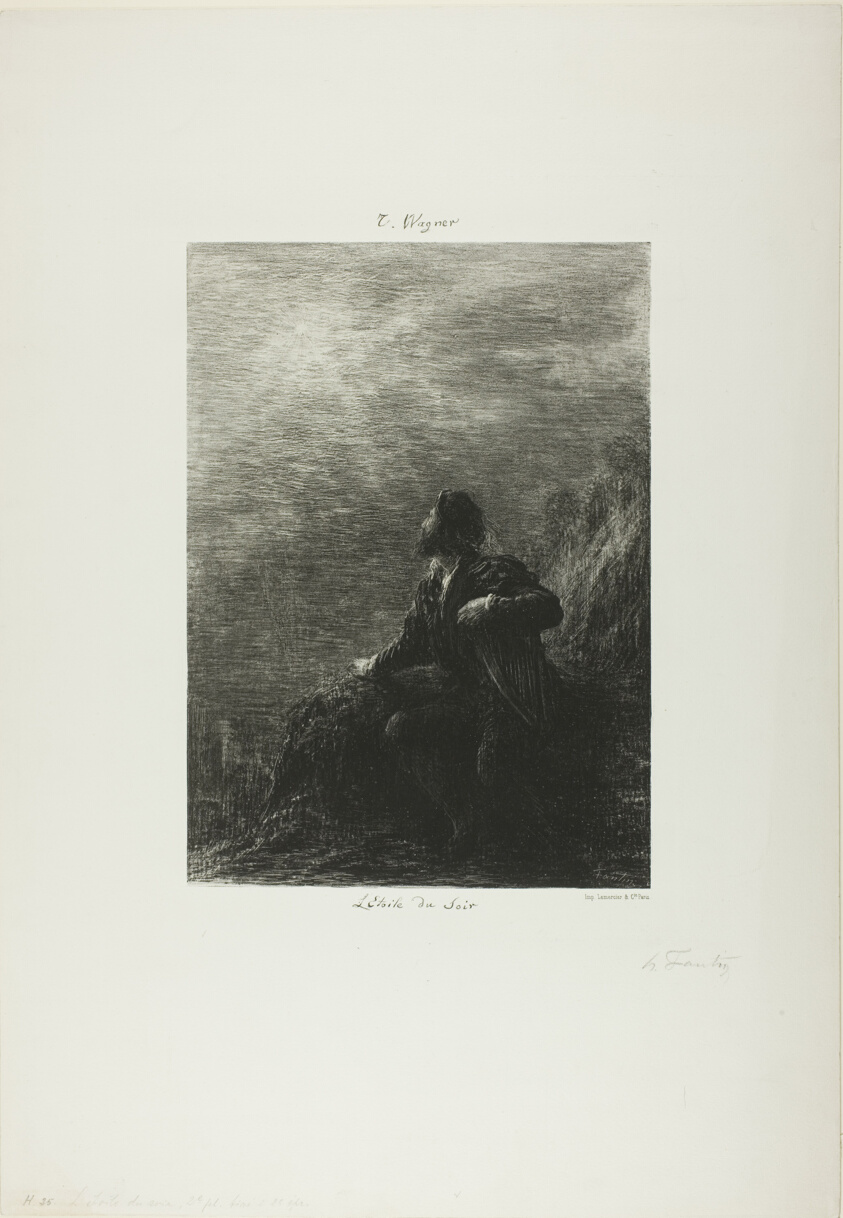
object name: Print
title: The Evening Star, second plate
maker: Henri Fantin-Latour (French, 1836-1904)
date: 1879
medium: Lithograph in black on light gray China paper laid down on white wove paper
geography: France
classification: lithograph; print; prints and drawing